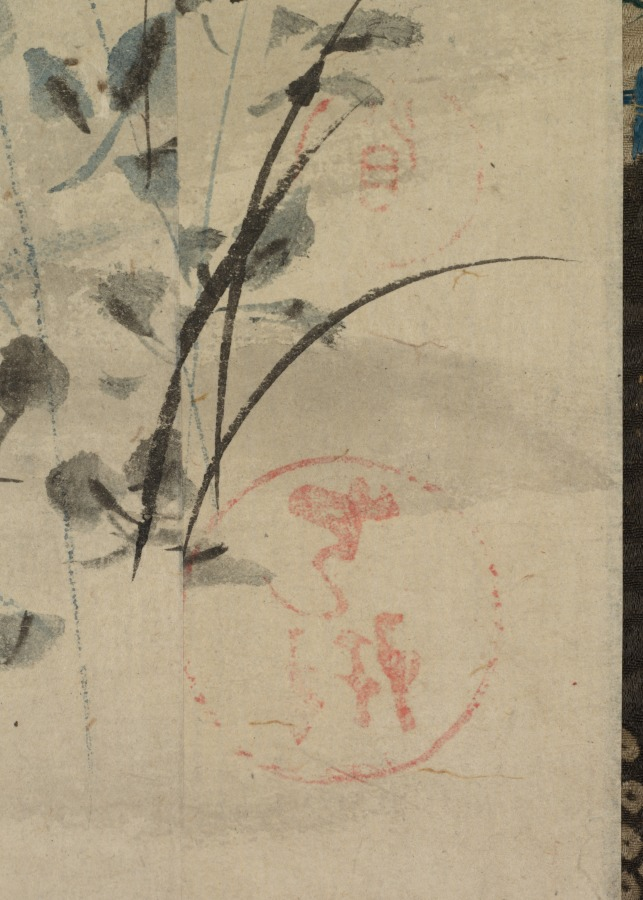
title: Pheasant and Grasses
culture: Japan, Edo period (1615–1868)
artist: attributed to Ogata Kōrin (Japanese, 1658–1716)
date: late 1600s–early 1700s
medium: hanging scroll; ink and color on paper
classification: Painting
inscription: two seals of artist, lower right.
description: Korin was a founder of the Rimpa (decorative) school of painting and was a keen observer of nature. The pheasant is often associated with autumn.